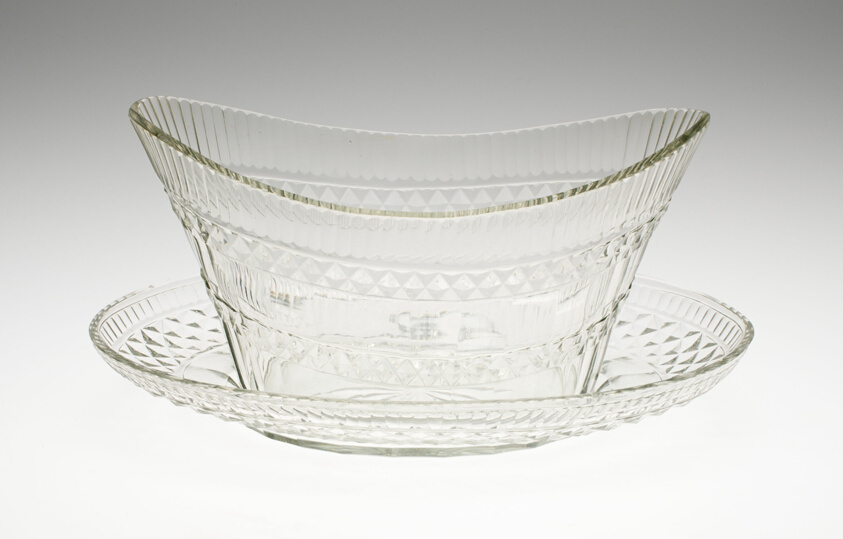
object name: Glass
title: Compote and Stand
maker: England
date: c. 1800/10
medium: Glass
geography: England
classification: compote; dish (vessel); glass; european decorative arts